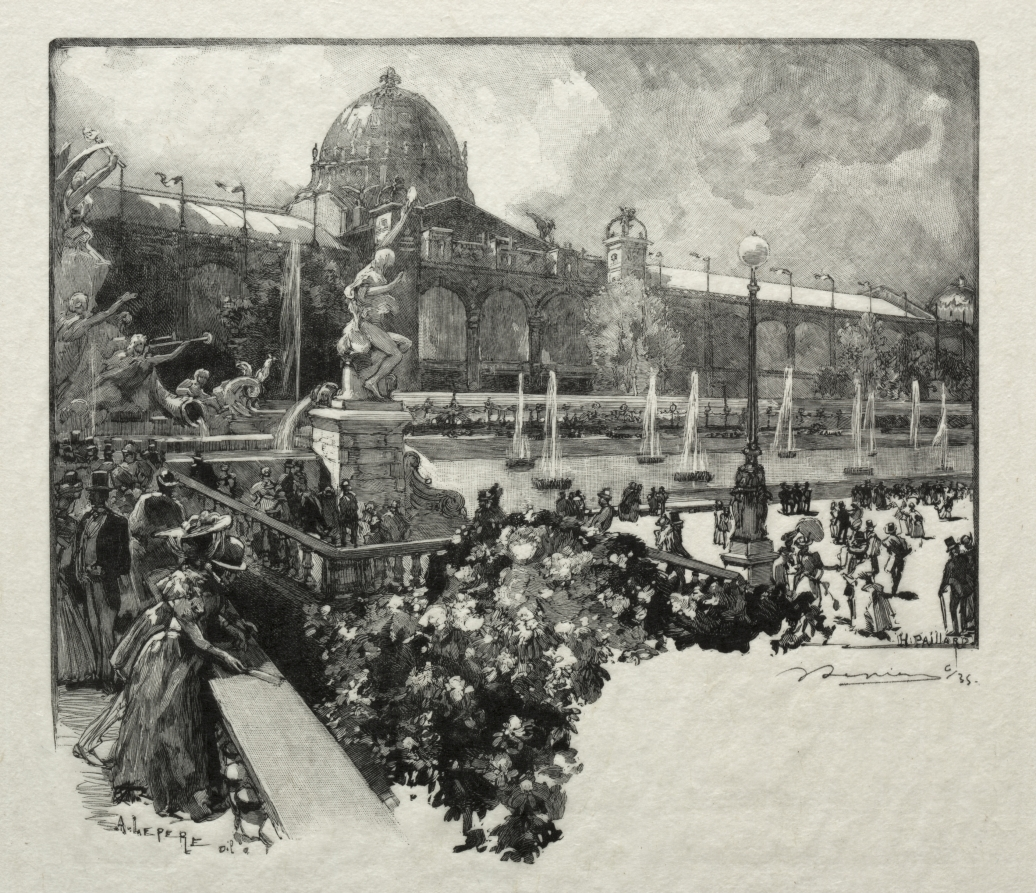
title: Le Palais des Arts Liberaux, Extérieur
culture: France, 19th-20th century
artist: Auguste Louis Lepère (French, 1849–1918)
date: 1889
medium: wood engraving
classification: Print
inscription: On block, lower left corner: "A. Lepère del"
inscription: On block, lower right: "H. Paillard"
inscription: Written in ink: "(signed) 6/35"